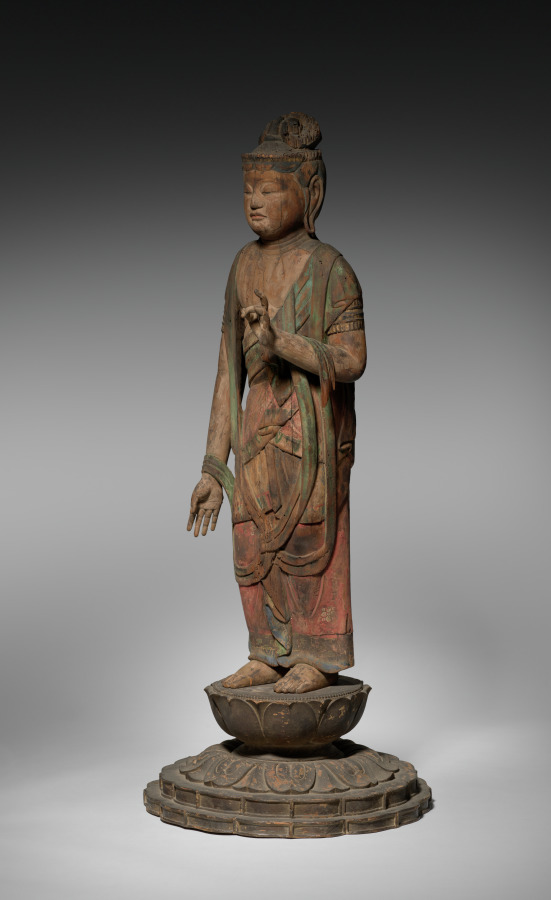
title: Shō Kannon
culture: Japan, Heian period (794–1185)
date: 900s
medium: Wood with traces of color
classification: Sculpture